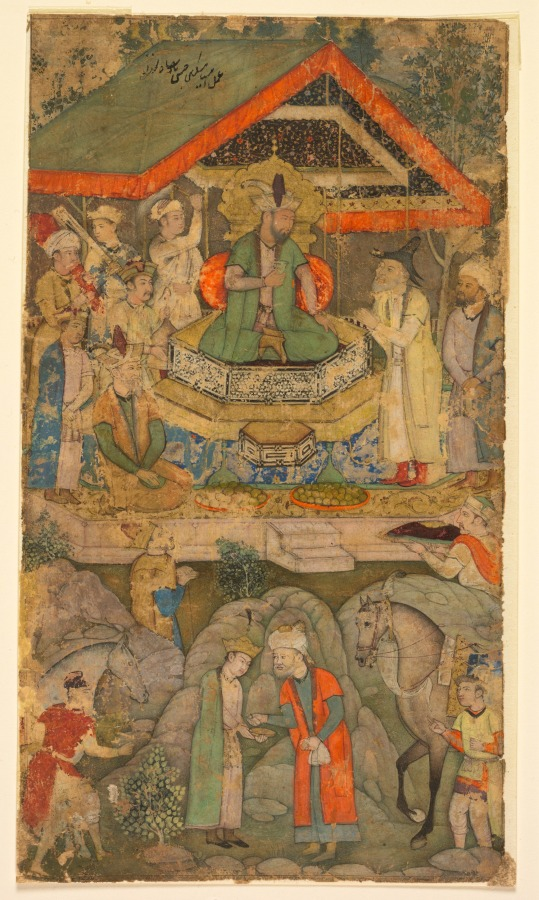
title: An Ambassador before Humayun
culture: Mughal India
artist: attributed to Miskin (Indian, active 1570s–c. 1604)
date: c. 1610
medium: Gum tempera and gold on paper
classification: Painting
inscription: Persian inscription at upper left probably added c. 1700s, in nasta‘liq script: the work of the master Miskin / Great King Hasan . . .]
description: Humayun, the second Mughal emperor of India, son of Babur and father of Akbar, is enthroned in an outdoor royal encampment. The scene recalls Humayun’s 15 years of exile between 1540 and 1555, many of which he spent traveling through Pakistan, Afghanistan, and Iran, after an Afghan rebel ousted him from India.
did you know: Humayun wore a special type of turban, his Taj-i Izzat (Crown of Power and Glory).